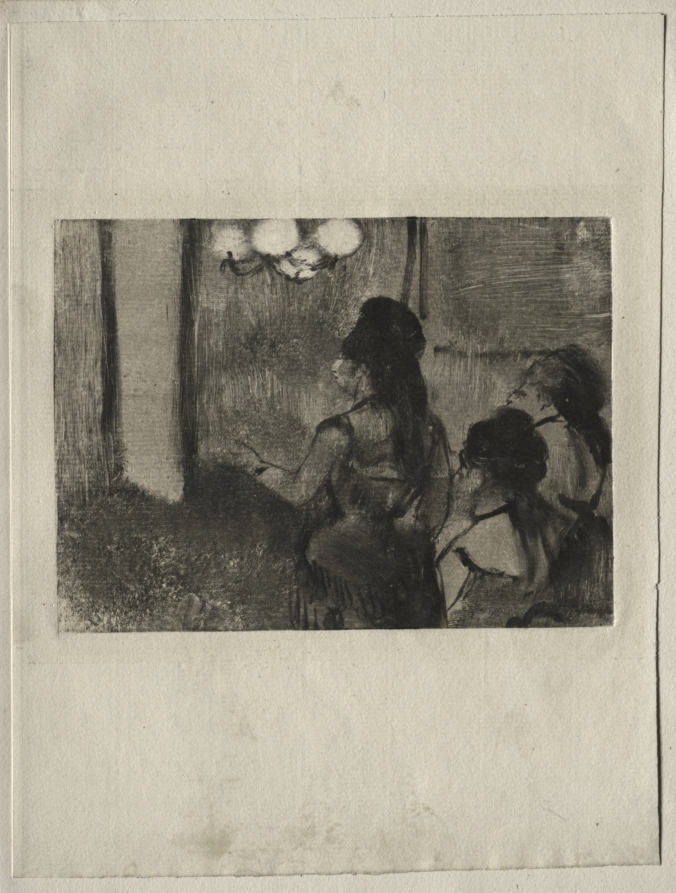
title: In the Salon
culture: France, 19th century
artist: Edgar Degas (French, 1834–1917)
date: c. 1880s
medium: monotype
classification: Print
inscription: Watermark: HALLINES [with fragment of shield]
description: Edgar Degas's series of monotypes depicting brothels depicted a hidden aspect of Parisian life. Degas's interest in the subject paralleled the theme of the prostitute in naturalist novels of the era by Emile Zola and Edmond and Jules de Goncourt, and echoed the then-contemporary debate about the regulation—or abolition—of prostitution in Paris. In this print, three women await their clients under a luminous globed chandelier. A standing figure reaches out her left arm as if to beckon an unseen visitor.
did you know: Edgar Degas's series of brothel monotypes was never exhibited during his lifetime and remained in the privacy of the artist's studio until his death.